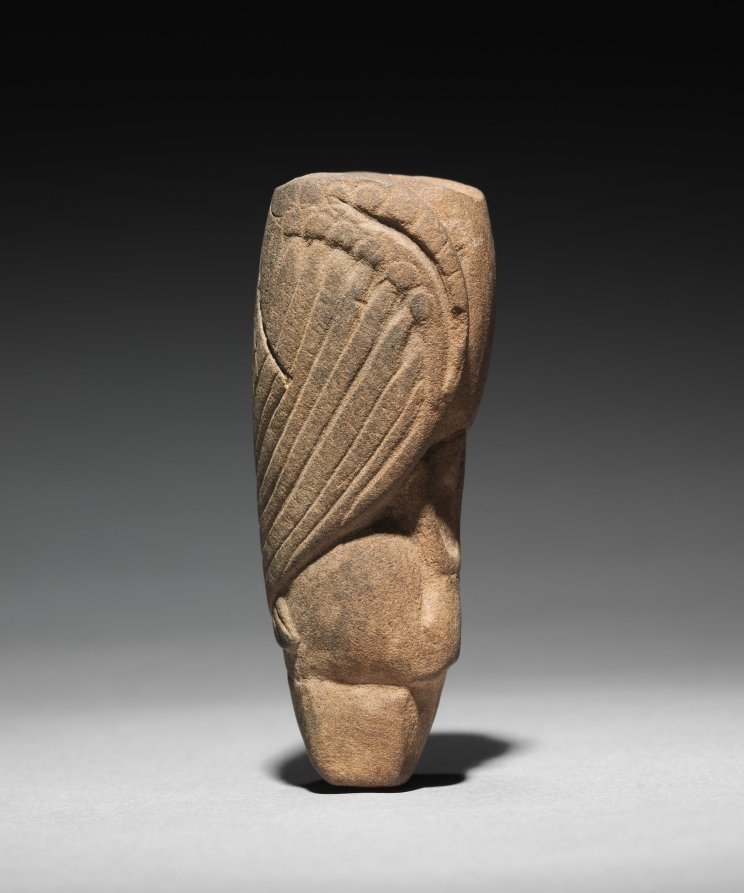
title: Bird Effigy Pipe Fragment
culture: Native North America, Adena people, Vance Mound, Newton Township, Licking County, Ohio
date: 400 BCE–100 CE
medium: sandstone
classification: Sculpture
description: The modest appearance of this small bird-effigy pipe, its head now lost, is misleading—the carving is fine and imagery, complex. The upper part takes the form of a bird’s body, the wings folded over the back. The section beneath the bird’s breast, intact but difficult to read, may depict a human torso with a pronounced navel and upraised forearms and hands, the palms facing outward. If so, one creature could be carrying or transforming into the other. The pipe was created by an artist of the ancient Adena people of southern Ohio. Smoke traveled through an interior channel to the mouthpiece, a small hole on the underside.